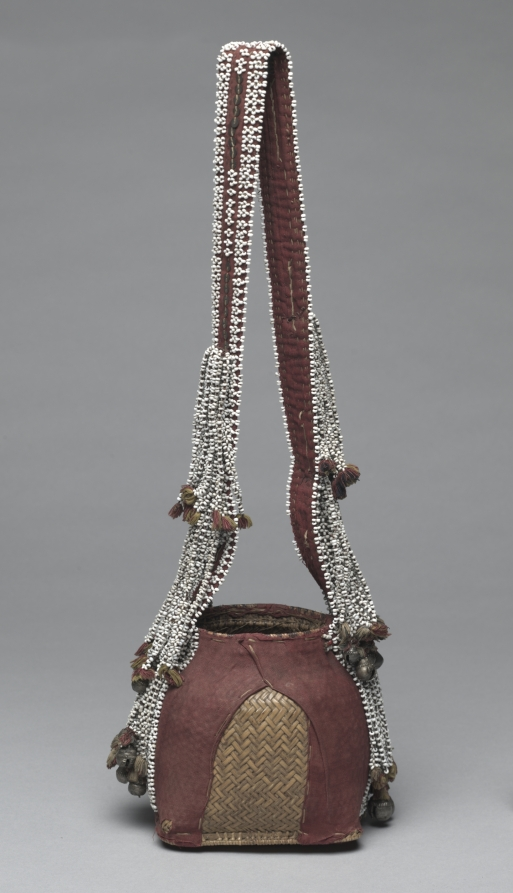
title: Shoulder basket (Bagobo people)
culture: Philippines, Davao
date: c. 1875–1917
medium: natural fibers, cloth, glass beads, metal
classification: Textile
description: This shoulder bag is built on a rigid, flat-bottomed rattan basket. A rough, red-dyed cotton cloth has been shaped to the basket and secured with abacá fiber stitching. The strap features small metal sequins sewn along the strap and at the hem. Additional beaded strands hang from the strap junction and rim, each terminating in small fiber-wrapped tassels.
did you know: The elaborate applied glass beadwork decorating the surface is characteristic of the Bagobo people.